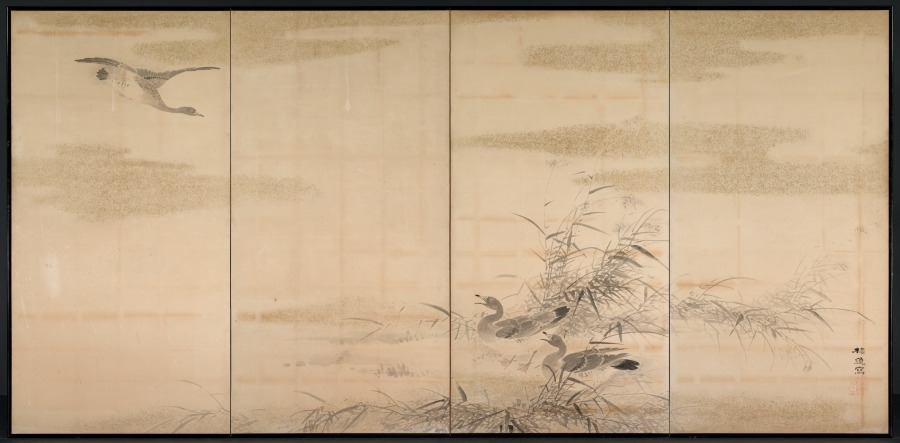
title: Geese, Reeds, and Water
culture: Japan, Edo period (1615–1868)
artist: Yamamoto Baiitsu (Japanese, 1783–1856)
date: 1800s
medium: One of a pair of four-panel folding screens; ink, color, and cut gold foil on paper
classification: Painting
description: This byōbu composition differs from most in that it comprises two four-panel screens, rather than two six-panel units. Since the current mounting is modern, it is impossible to determine whether its present configuration represents its original design. Some panels may have been removed to help the screens better fit into a modern interior space. Baiitsu worked almost exclusively in monochromatic ink tones and favored classical Chinese painting themes.